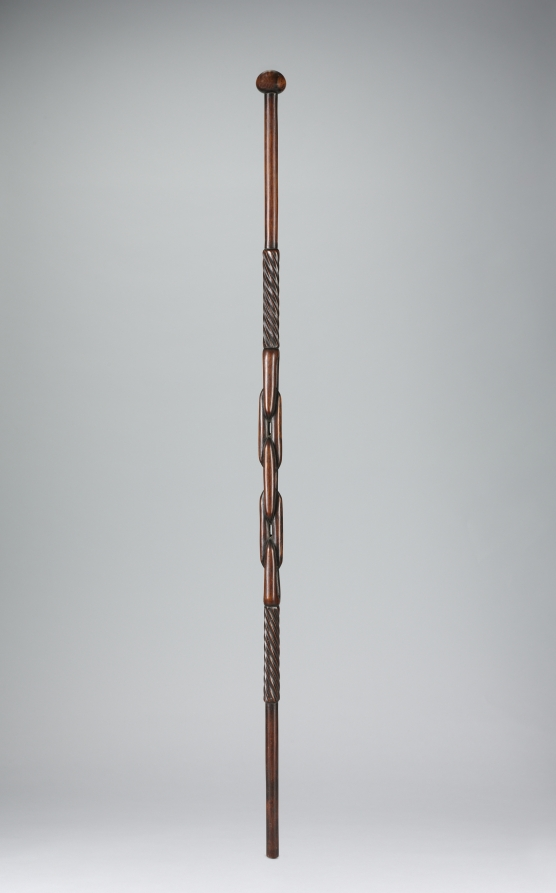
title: Prestige Staff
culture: Africa, Southern Africa, South Africa, Tsonga-style or Zulu-style maker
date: 1800s–1900s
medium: Wood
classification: Implements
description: The primary use of long staffs like this was purely practical; they served as walking companions when their pastoralist-owners covered long distances accompanying their cattle in search of new pastures. The tall height of this staff indicates the elevated status or special function of the man who owned it. Carved from one piece of wood, its spherical knob finial and the geometric designs incorporated into its shaft decoration—consisting of spiraling segments and chain links—demonstrate its maker’s superior skills.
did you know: Tsonga and Zulu staffs all have strong symbolic associations and value. They visually connect the identity of their owners with that of their ancestors and with that of the community to which they belong.